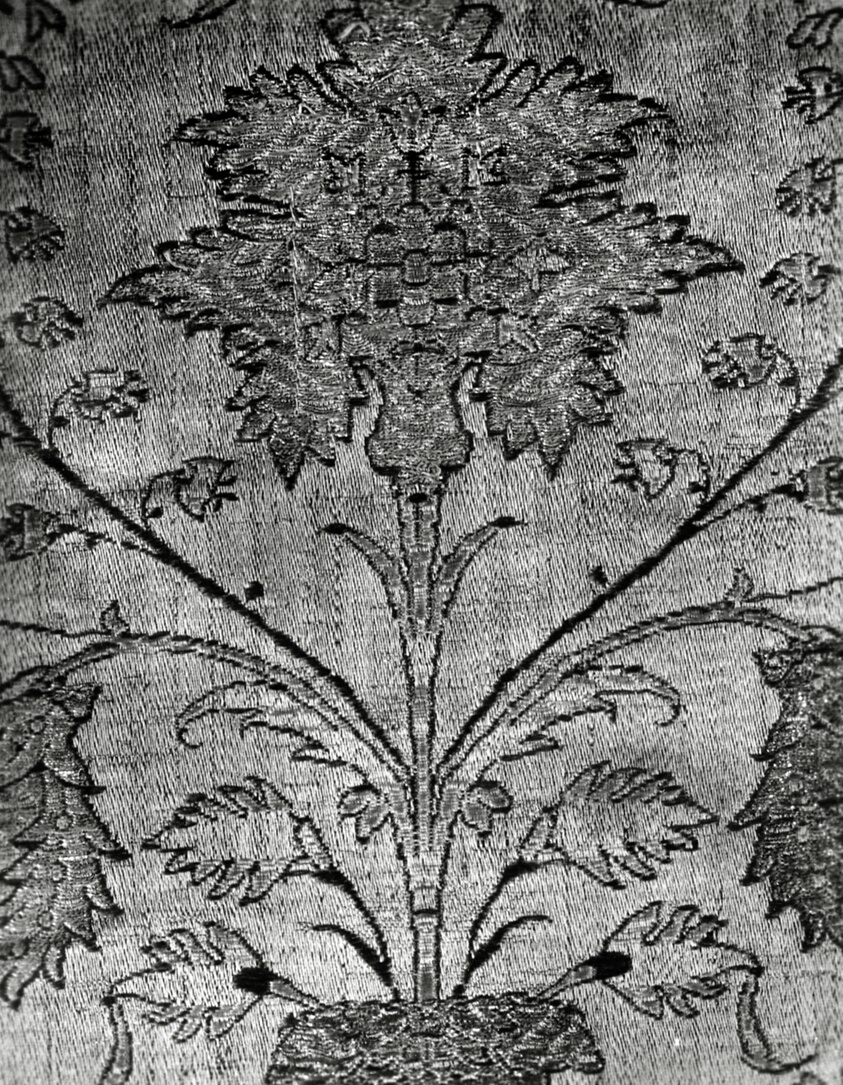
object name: Textile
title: Fragment (Dress Fabric)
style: isfahan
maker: Iran (Persia, Isfahan)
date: 17th century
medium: Silk, brocaded fancy compound satin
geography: Iran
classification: textile; weaving